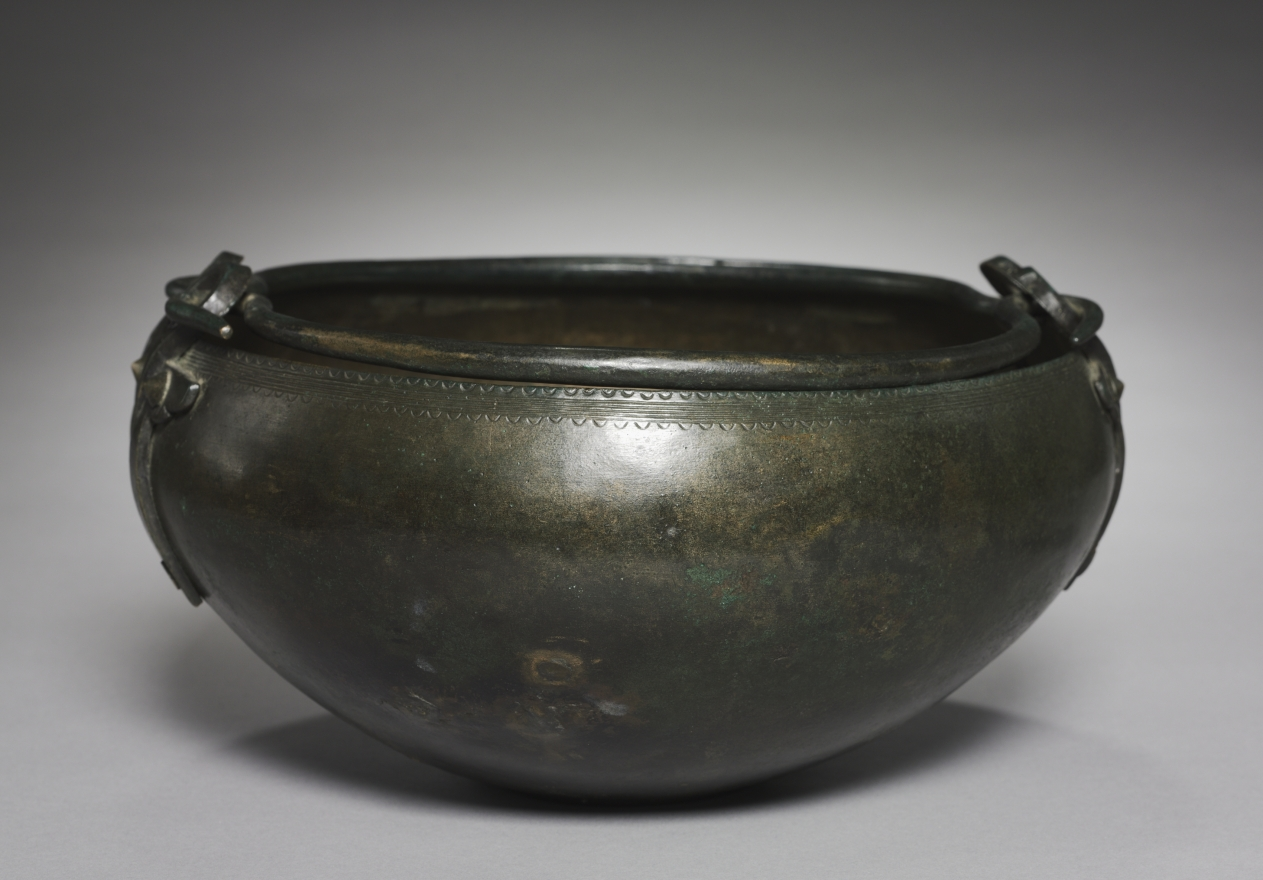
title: Ritual Cauldron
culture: Hungary, Bronze Age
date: c. 1000–900 BCE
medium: bronze, hammered, cast and wrought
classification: Metalwork